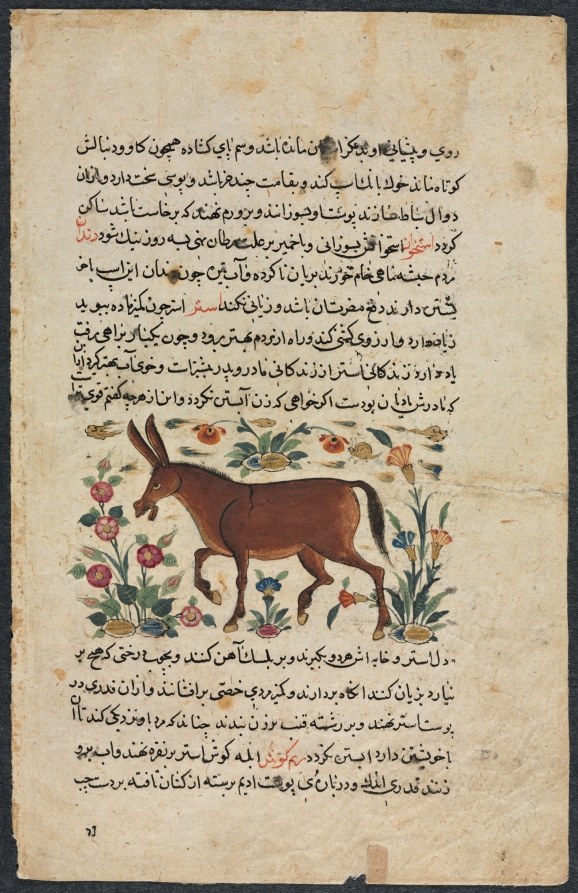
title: Khar (Ass), from a Nuzhat-nama-yi ala'i (Excellent Book of Counsel) of Shahmardan ibn Abi al-khayrr (verso)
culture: Timurid Iran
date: 1400s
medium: ink and opaque watercolor on paper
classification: Manuscript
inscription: script: Naskh